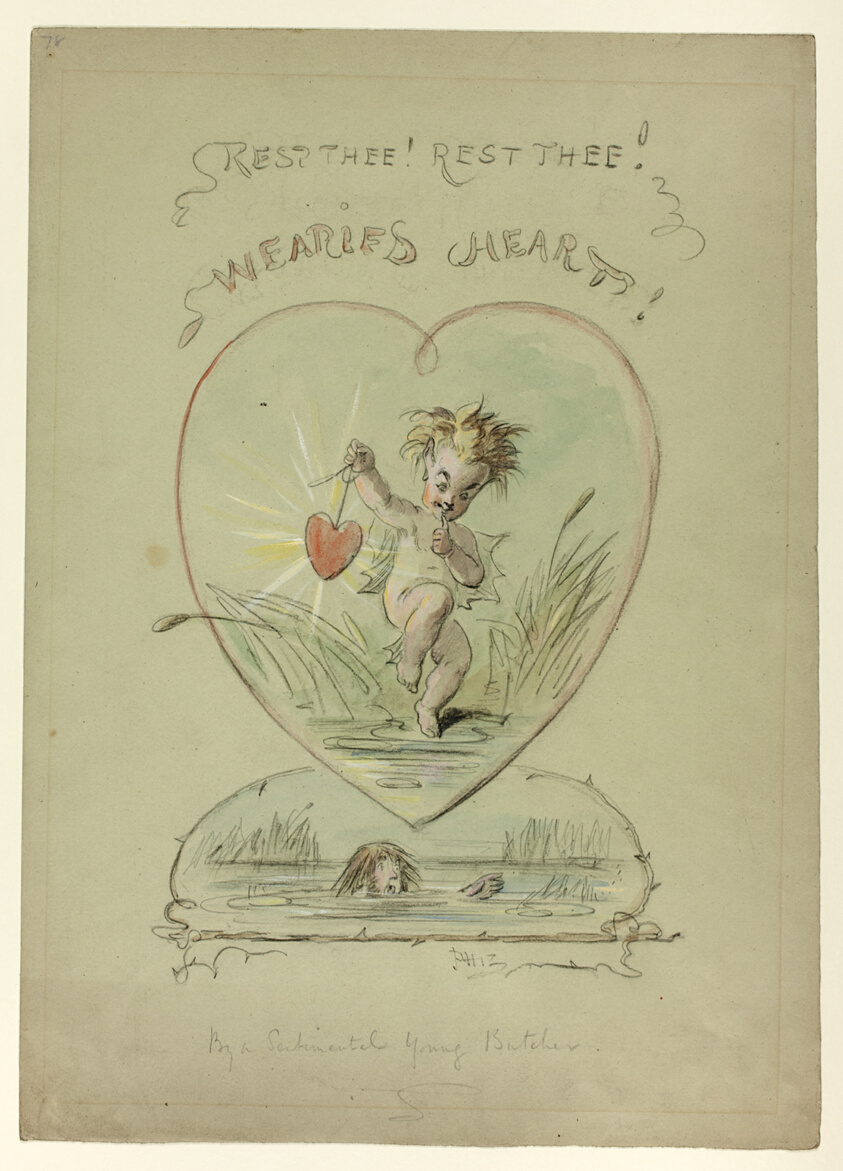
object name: Drawing and Watercolor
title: Rest Thee! Rest Thee! Wearied Heart!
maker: Hablot Knight Browne (English, 1815-1882)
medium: Watercolor and gouache, with black crayon, over touches of graphite, on grayish-green wove paper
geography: England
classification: watercolor; drawings (visual works); prints and drawing